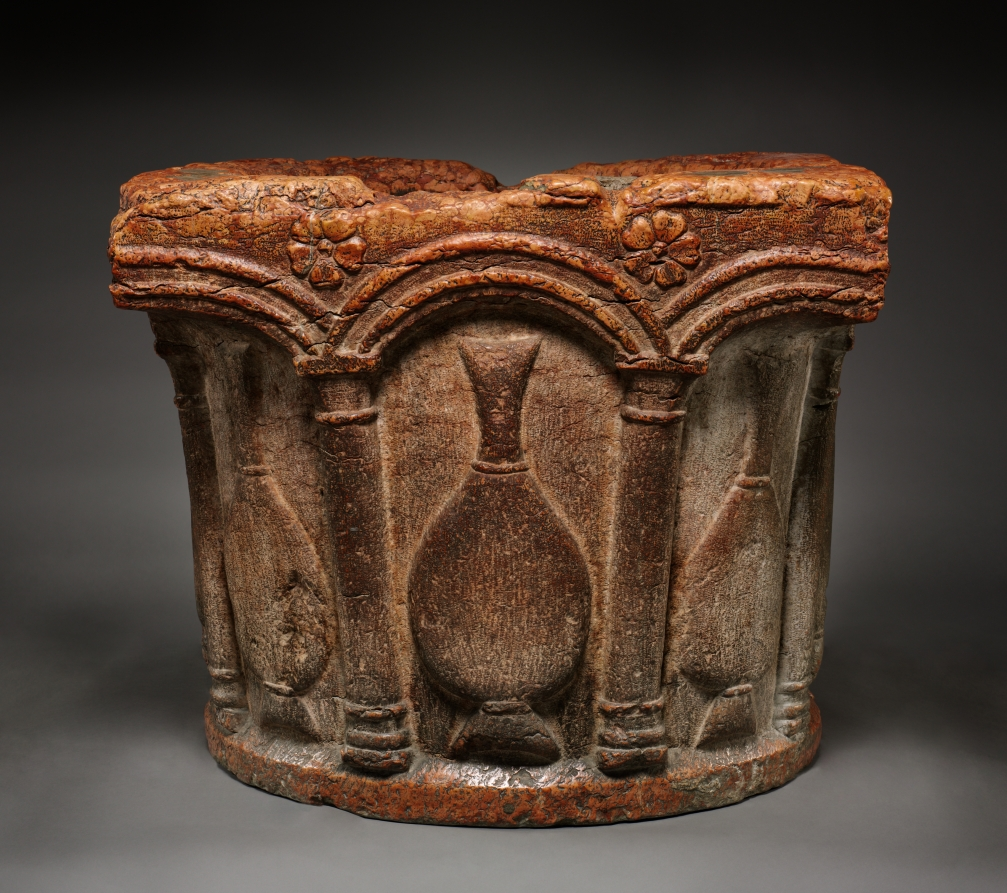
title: Well Head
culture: Italy, probably Verona, 15th century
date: 1400s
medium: pink limestone (called "Verona Marble")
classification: Sculpture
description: A well head is an architectural element that protects the mouth of a well. This example is both decorative and functional. The durable pink limestone well head facilitated access to the water whose restorative nature is echoed in the flowers and vases that ornament its surface.